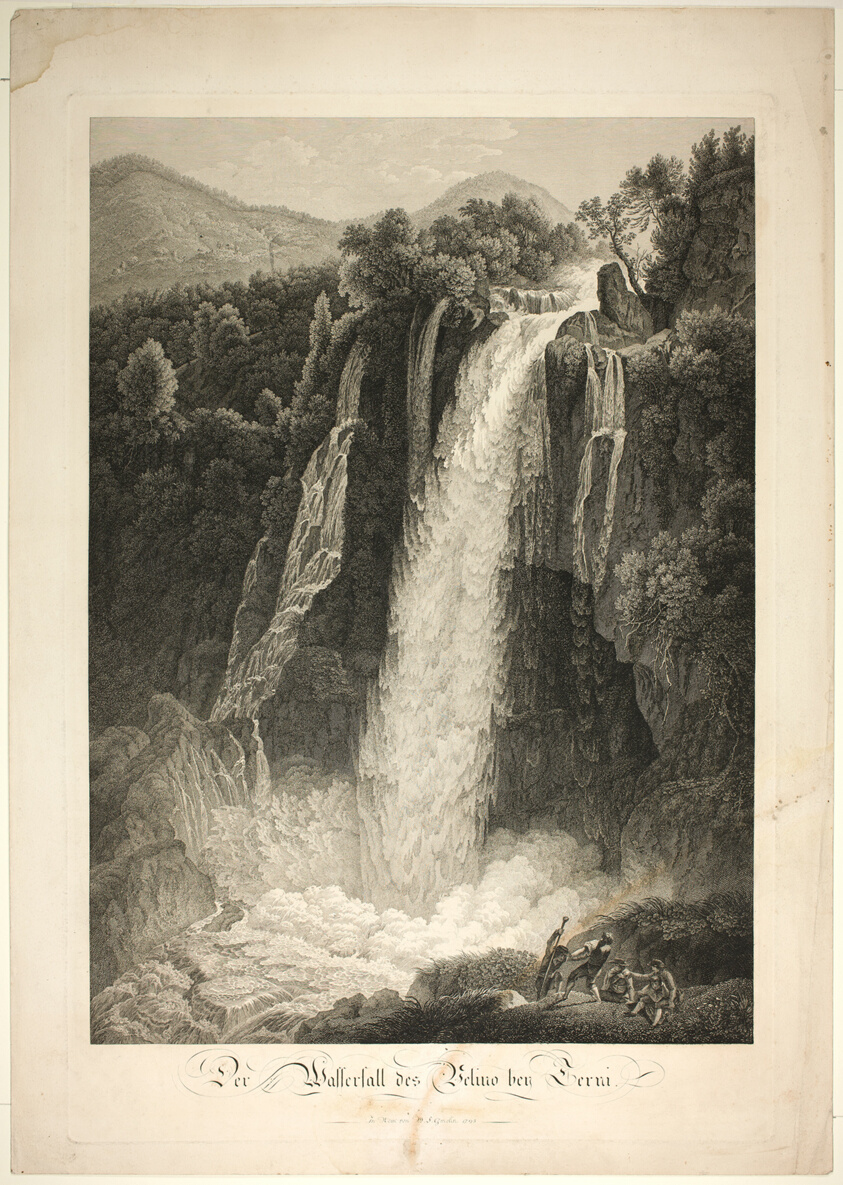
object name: Print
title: The Waterfall of Velino Near Terni, Rome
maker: Friedrich Wilhelm Gmelin; German, 1760-1820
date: 1795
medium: Etching and engraving on cream wove paper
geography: Germany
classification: etching; print; prints and drawing